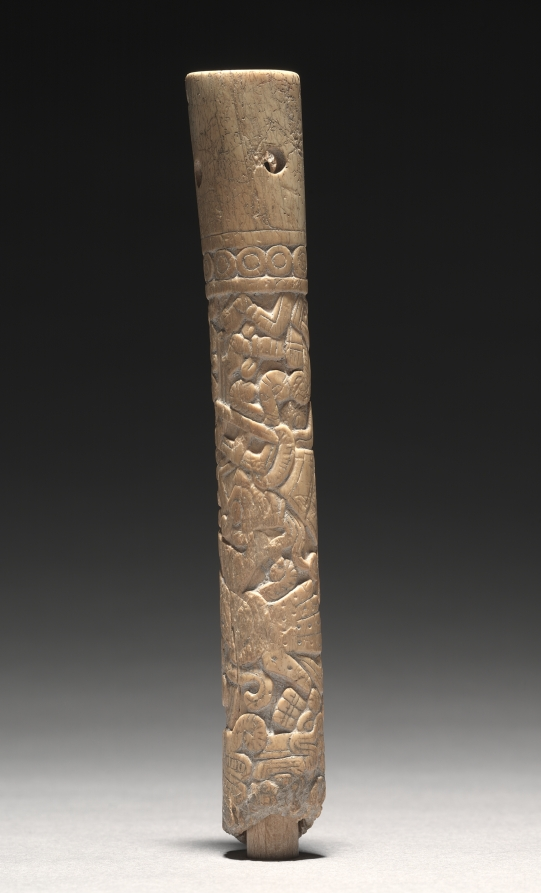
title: Carved Tube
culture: Mexico, Oaxaca, Mixtec, 13th-16th century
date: c. 1200–1519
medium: bone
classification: Jewelry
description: Carved in spiral registers, the ornamentation on this bone tube resembles Mixtec painting, both in codices (screenfold books) and architectural murals.